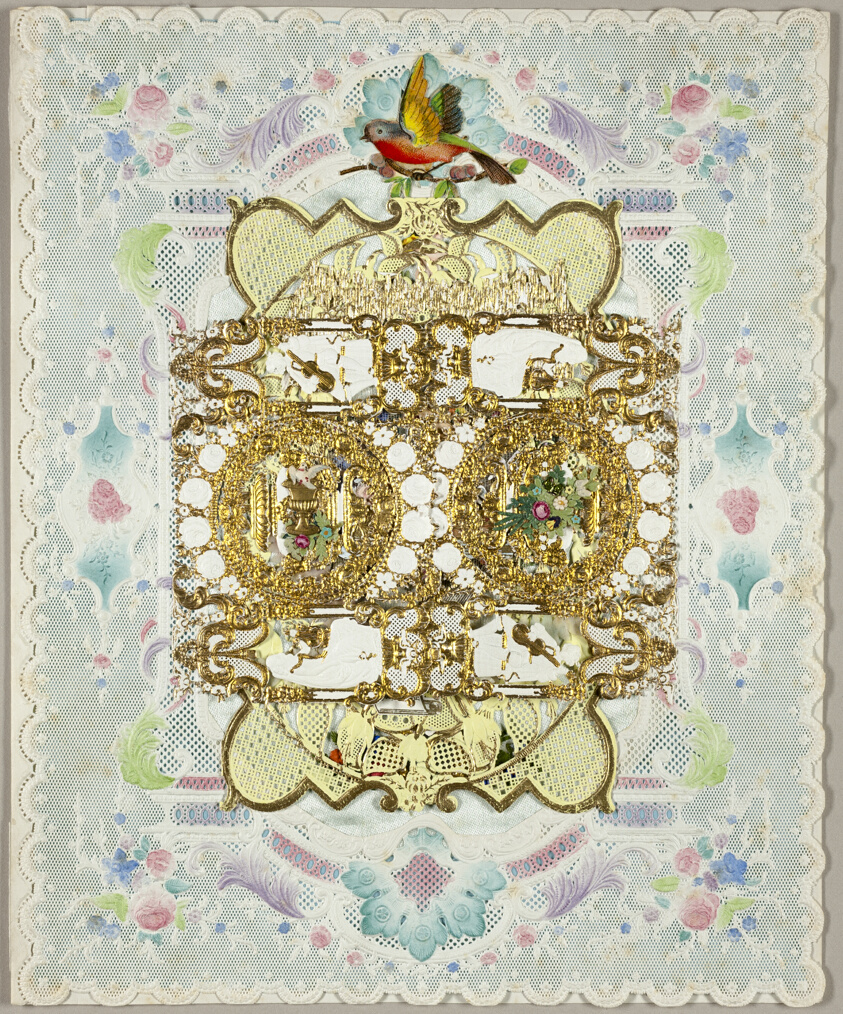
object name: Drawing and Watercolor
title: Untitled Valentine (Urn with Bird and Flowers in Wreaths of Gold Flowers)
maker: Unknown Artist; English, 19th century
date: c. 1850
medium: Watercolor and gold paint with collaged elements on cut and embossed ivory wove paper (lace, folded) with blue wove paper insert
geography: England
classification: valentine; prints and drawing; paper